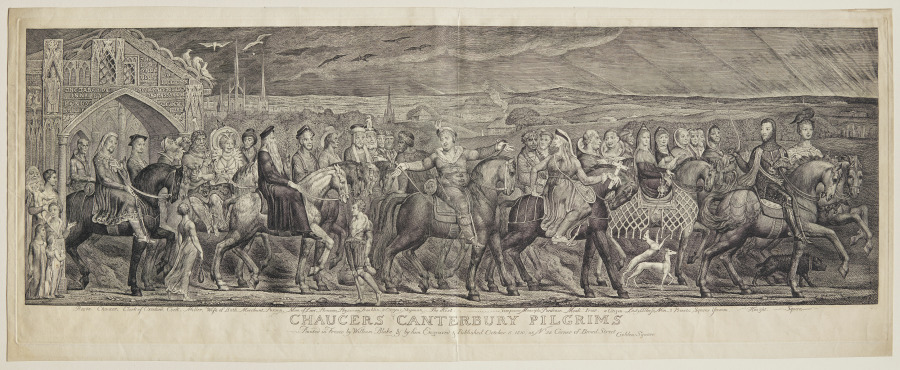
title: Chaucer's Canterbury Pilgrims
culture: England, 19th century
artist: William Blake (British, 1757–1827)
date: 1810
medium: engraving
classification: Print